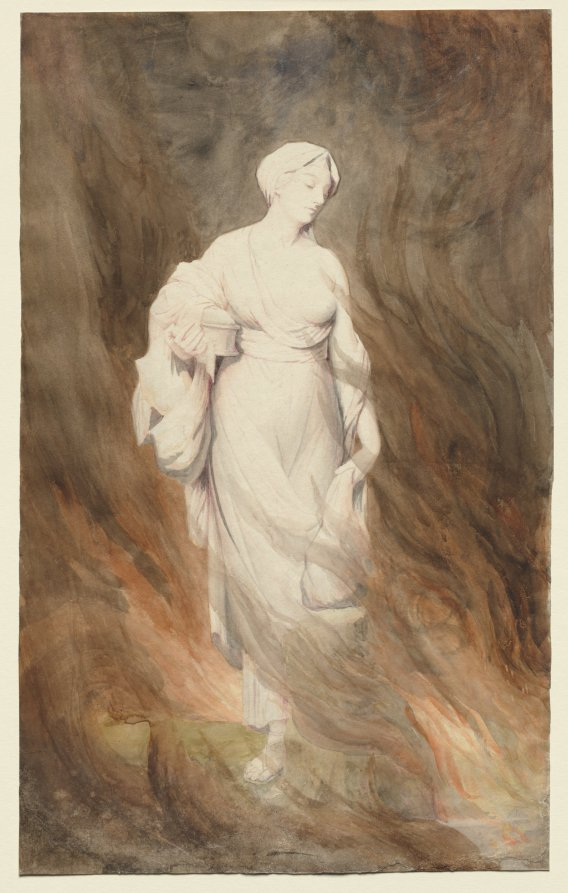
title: Lot's Wife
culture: England, 19th century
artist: Alfred George Stevens (British, 1817–1875)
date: c. 1837–75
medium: watercolor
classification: Drawing